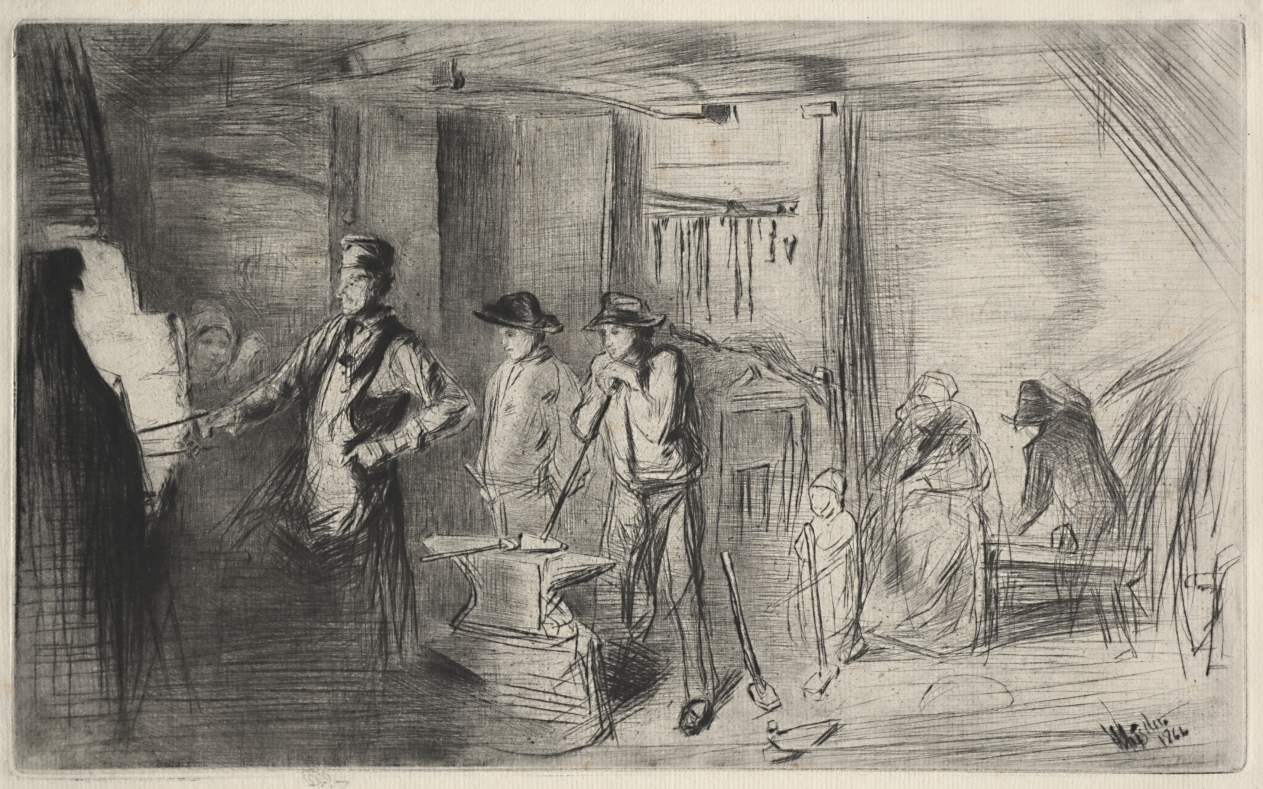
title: The Forge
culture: America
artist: James McNeill Whistler (American, 1834–1903)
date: 1862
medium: etching and drypoint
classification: Print